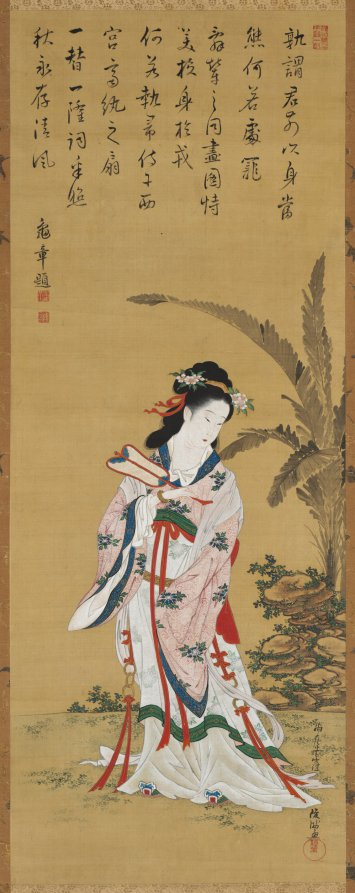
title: Chinese Beauty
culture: Japan, Edo period (1615–1868)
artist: Kubo Shunman (Japanese, 1757–1820)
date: late 1700s–early 1800s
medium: Hanging scroll; ink and color on silk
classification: Painting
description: Ukiyo-e artists’ exploration of beautiful people extended to figures from other lands. Here, an elegant Chinese palace lady holding a fan stands before a banana plant. The poem at the top is written in a Japanese appropriation of Chinese called kanbun. Based on its imagery of a palanquin (an enclosed couch with poles used for carrying passengers), silk fan, and autumn winds, it may allude to the story of Lady Ban (about 48 BC–about AD 2). A Chinese beauty famous for her scholarly achievements, Ban was once consort to an emperor but later lost his favor. In a poem attributed to her, she compared herself to a used silk fan put away in autumn.